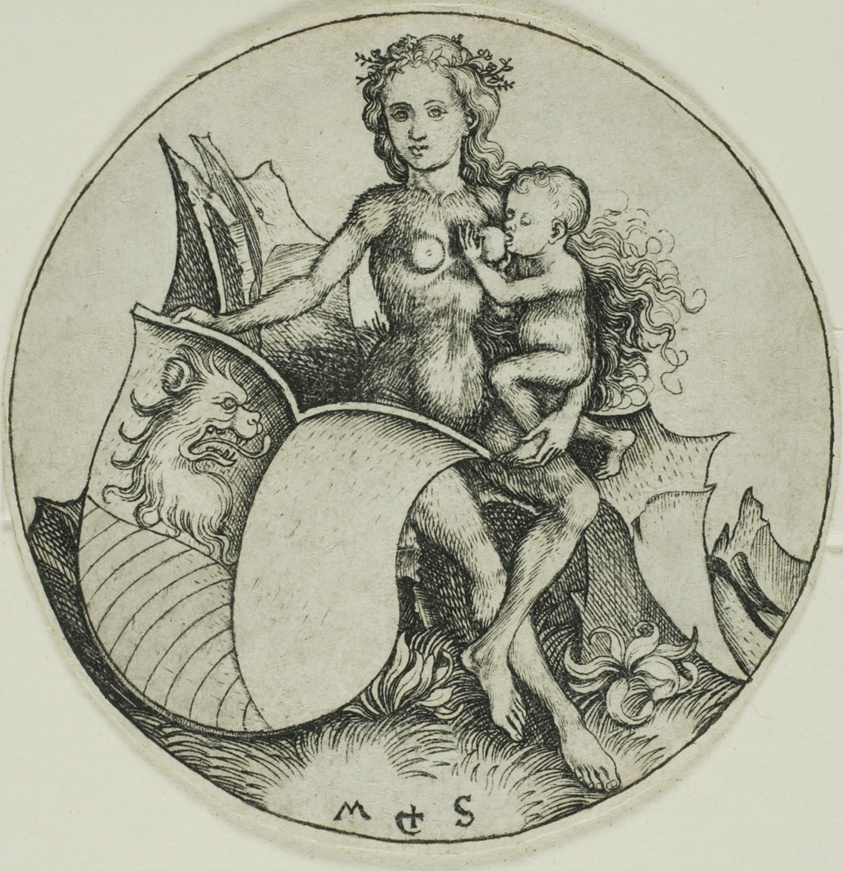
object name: Print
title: Shield with a Lion's Head, Held by a Wild Woman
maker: Martin Schongauer (German, c. 1430/50-1491)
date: 1480/90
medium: Engraving in black on ivory laid paper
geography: Germany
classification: engraving; print; prints and drawing